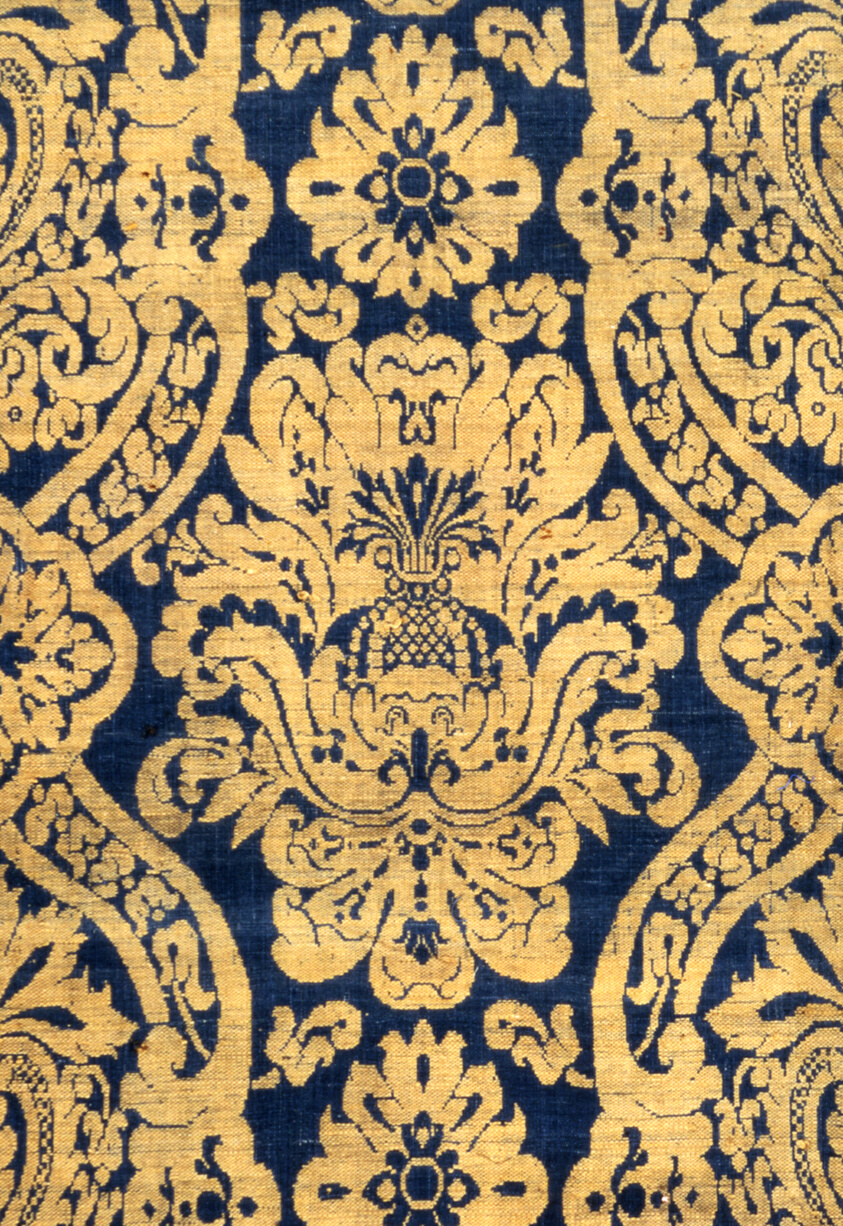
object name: Textile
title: Panel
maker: France, Abbeville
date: c. 1700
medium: Cotton and linen, plain weave with plain interlacings of secondary binding warps and patterning wefts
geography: France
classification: textile; weaving